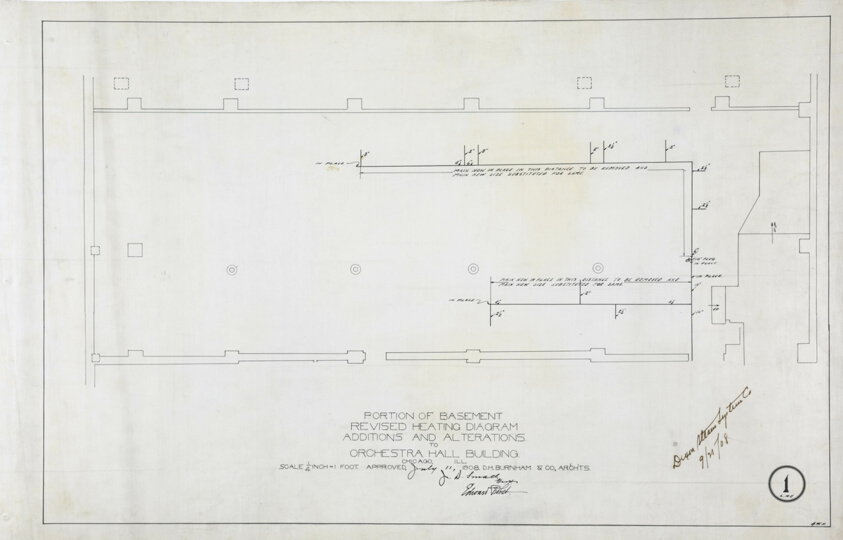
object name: Architectural Drawing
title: Orchestra Hall Heating Revisions, Chicago, Illinois, Diagrams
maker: D.H. Burnham & Company; American, 1896–1912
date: 1908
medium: Ink on linen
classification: architecture; architectural drawing